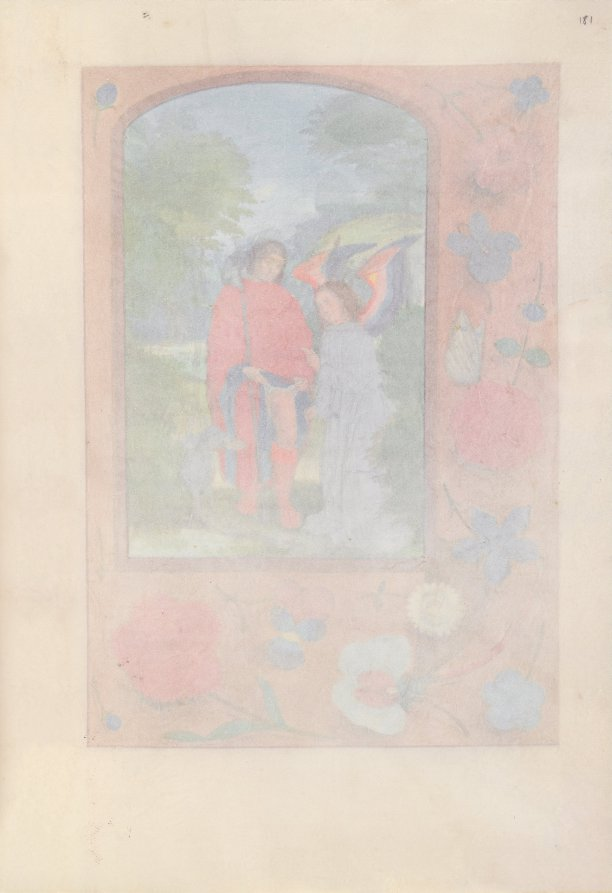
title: Hours of Queen Isabella the Catholic, Queen of Spain: Fol. 181r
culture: Flanders, Ghent and Bruges, late 15th century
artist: Master of the First Prayerbook of Maximillian (Flemish, c. 1444–1519)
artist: and Associates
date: c. 1500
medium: ink, tempera, and gold on vellum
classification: Bound Volume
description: This manuscript was illuminated by a circle of at least five highly organized manuscript painters active in the Flemish cities of Ghent and Bruges. The principal illuminator was Alexander Bening, who painted the majority of the book's miniatures. Manuscripts produced by this circle of artists are renowned for the decoration of their borders, which typically feature a rich variety of realistically-painted flowers, birds, and butterflies. This prayer book, called a book of hours, was intended not for a cleric, but for the private devotions of a lay person-in this case, Isabella the Catholic, Queen of Spain (1451-1504). Isabella's coat of arms embellishes the book's frontispiece. It is unlikely that the book was commissioned by the Queen herself; rather, she probably received it as a diplomatic gift from someone courting her patronage, perhaps Cardinal Francisco Jimenez de Cisneros. A Franciscan friar, Jimenez was dependent upon Isabella for his advancement, first to the post of Queen's confessor in 1492, and then to Archbishop of Toledo in 1495.